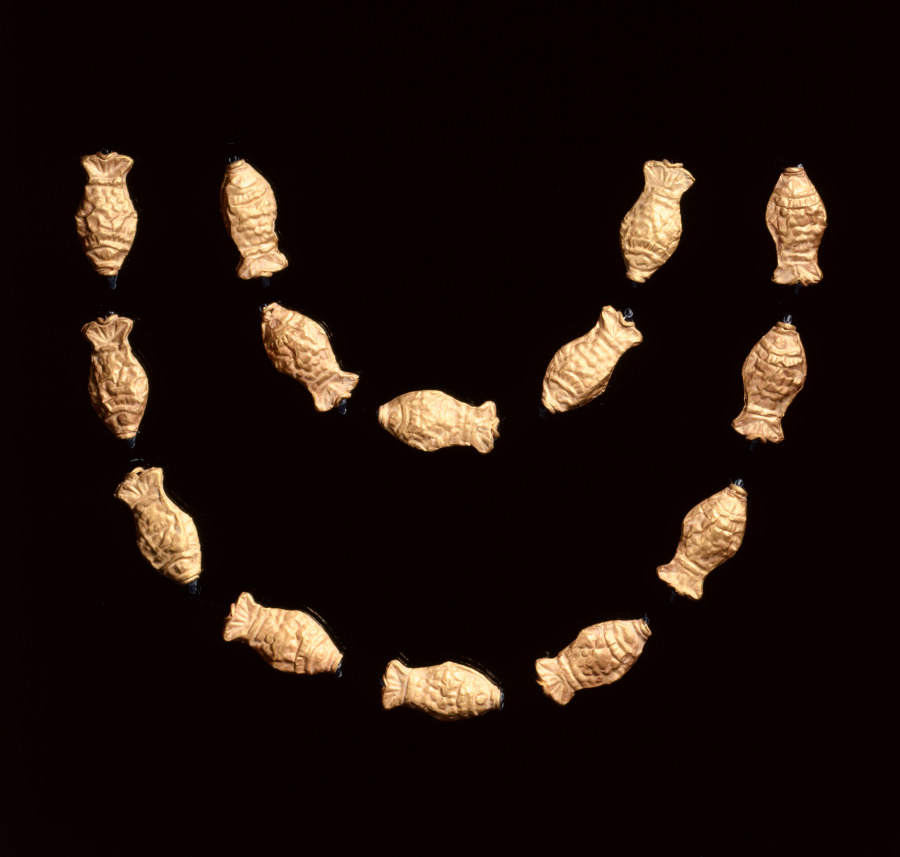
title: Necklace Beads in the Form of Fish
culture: India, Shunga period (185–78 BCE)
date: 185–72 BCE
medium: gold repoussé with granulation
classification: Jewelry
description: Jewelry in ancient India often consisted of elements associated with water, such as fish and other aquatic plants and animals. Since water is essential for life, imagery that connotes water is life-affirming, or auspicious, and therefore appropriate adornment.